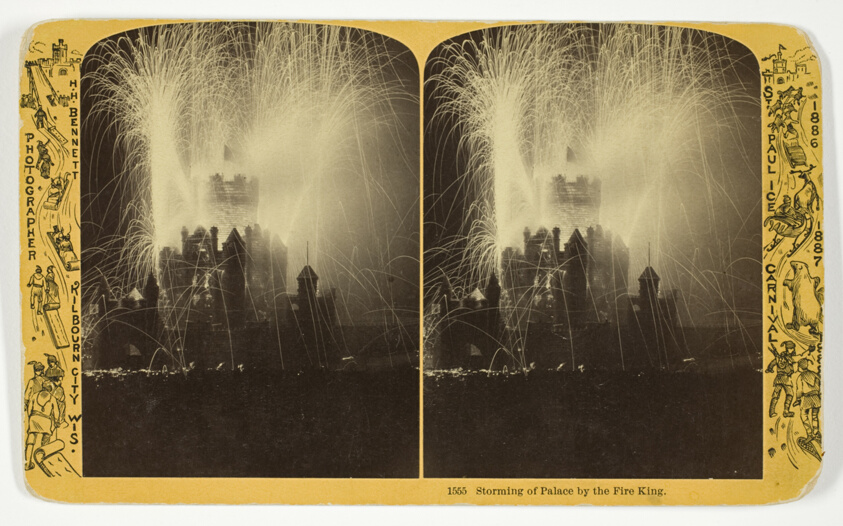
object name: Photograph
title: Storming of Palace by the Fire King, No. 1555 from the series "St. Paul Ice Carnival"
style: 19th century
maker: Henry Hamilton Bennett (American, born Canada, 1843-1908)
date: 1886/88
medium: Albumen print, stereo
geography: Wisconsin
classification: photography; photograph; albumen silver print; stereograph (albumen)